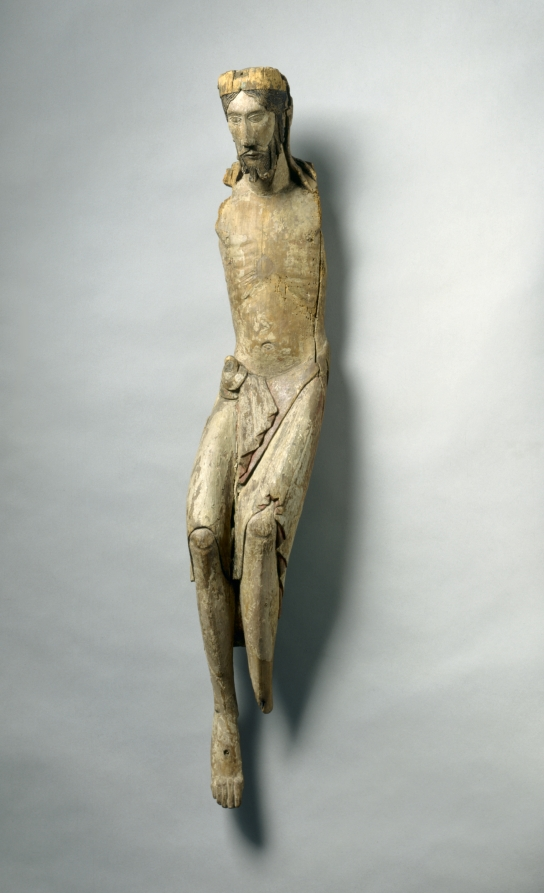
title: Corpus from a Crucifix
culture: France, Burgundy, Autun?, 12th century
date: c. 1130–1140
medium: polychromed wood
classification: Sculpture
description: By the 11th century, monumental crucifixes carved from wood and painted were a common feature of church interiors. Placed on or suspended above the main altar, they reminded viewers of Christ’s sacrifice on behalf of mankind at the Crucifixion, an event reenacted every time Mass was celebrated on the altar below. Crucifixes also invited prayer and meditation on Christ’s role as Redeemer. This fragmentary but finely carved corpus, or body of Christ, once belonged to such a crucifix.